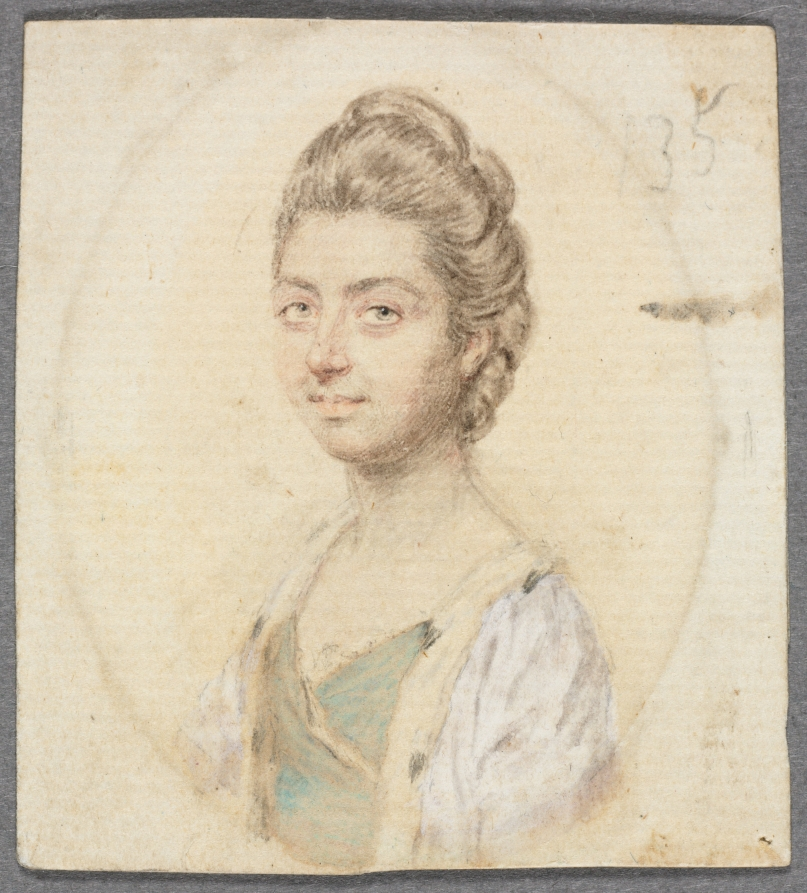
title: Portrait of Sukey, Lady Oglander, née Serle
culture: England, 18th century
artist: John I Smart (British, 1741–1811)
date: c. 1770s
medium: graphite and wash on laid paper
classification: Portrait Miniature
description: Although it is impossible to say if it was always part of the artist’s process to execute a preparatory sketch prior to painting each miniature, we do know that John Smart retained many hundreds of these sketches. A group of preparatory sketches—of which this portrait is one—descended through the Smirke family after Smart’s daughter Sarah gave a sketchbook containing preparatory portrait studies to her friend Mary Smirke, sister of the celebrated Victorian architect Sydney Smirke. This book was probably broken up around 1877 when it was divided between Sydney’s daughters Mary Jemmett and Mrs. Lange, whose portions were both sold at auction in 1928. G. C. Williamson was the first to suggest that Smart’s sketches were well known and that they were preparatory studies for the painted miniatures. Williamson listed the names of sitters from the sketches known to him at the time, and they include Lady Oglander. This portrait was assigned the historically colorful but fictitious title of “Duchess of Bourbon” at some point after memory of its true identity had been lost. Giving illustrious titles to portraits of unknown sitters was a popular strategy adopted by dealers during the nineteenth and twentieth centuries, often applied to miniature portraits and, in particular, to Smart’s sketches of women. However, when the paper backing was removed from this miniature, the name Lady Oglander was discovered written twice in graphite on the back. The lower inscription seems to have been reinforced or written later and is probably not in the artist’s hand. Compared to his contemporaries George Engleheart (1752–1829) and Andrew Plimer (1763–1837), whose female sitters were often painted in similar simple white gowns, Smart often lavished more attention on the costumes in his portraits of women, whose dresses incorporated colored silks, printed fabrics, and luxury trimmings like lace and fur, as seen here. The sitter’s head and shoulders face right, and her light hair is dressed high, with flat curls at the back of her head. She has gray eyes and wears a lavender surcoat trimmed with ermine, over a turquoise blue, low-necked dress and white underslip bordered with lace; the ermine trim confirms that the sitter was a titled lady. Smart placed her inside a faintly suggested oval, and the background is unpainted. Sukey, Lady Oglander (née Serle, d. 1805), married Sir William Oglander, 5th Baronet of Nunwell (1733–1806), in 1765. She was the only daughter of Peter Serle of Testwood, Hants, and delighted the Oglander family by bringing £10,000 to the marriage. Sukey had eleven children with William, eight of whom survived childhood. The Oglanders were a prominent and well-loved family on the Isle of Wight, their presence on the island first dating from the time of William the Conqueror and lasting until the title expired in 1874 when the last Oglander Baronet of Nunwell died. This preparatory sketch somewhat resembles a miniature on ivory of the same size that sold at Christie’s, London, in 2000. The sitter’s name is unknown, but she wears a nearly identical green wrap gown and underslip and a lavender surcoat, though it is trimmed with brown fur rather than ermine. Her coiffure is similar to that in the preparatory sketch as well, though in the ivory her hair is ornamented with pearls. The facial features, however, differ, with the sketch representing an older woman having somewhat coarser features. While the portrait may have been idealized in the finished ivory version, it is also possible that the sketch was employed primarily for the costume and depicts another sitter entirely. Daphne Foskett lists among Smart’s work portraits of a Dr. John Oglander and a Lady and Miss Oglander. A preparatory sketch by Smart of a Mr. Oglander sold at Christie’s, London, on June 10, 2010. Another preparatory sketch titled Portrait of John Oglander, Warden of New College, Oxford, was sold at Bonhams, London, on October 30, 2001. These sketches are approximately the same size as Cleveland’s Lady Oglander and may have been commissions related by date or patron. The sale of Smart drawings inherited by W. H. Bose and sold at Christie’s, London, in 1937 included a “Head of Miss Oglander,” “sister to Sir John Oglander of the Isle of Wight,” but this lot was not illustrated, and its relationship to the sketch discussed here is unknown. John Oglander, Warden of New College, Oxford, was the brother-in-law of Sukey, Lady Oglander, and Miss Oglander was probably her sister-in-law Susannah Oglander (d. 1816).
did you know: Sketches helped John Smart work out the particulars of a portrait before commencing the miniature on ivory, and they were useful in the event that a duplicate might later be required.